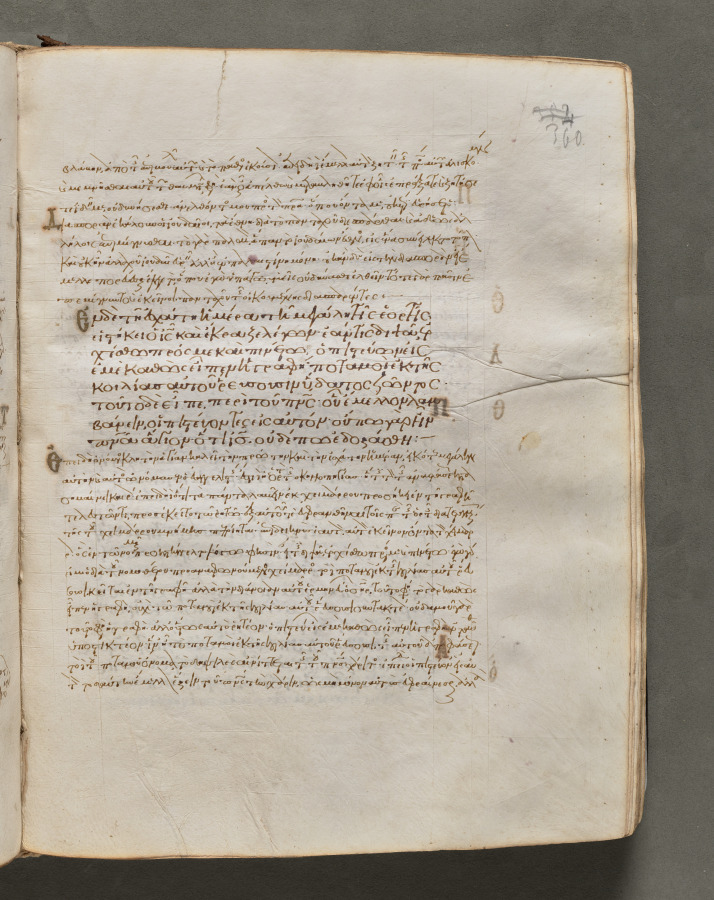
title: Text, folio 360 (recto), from a Gospel Book with Commentaries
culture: Byzantium, Constantinople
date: c. 1000–1100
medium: ink, tempera, and gold on vellum; leather binding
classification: Bound Volume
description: Each of the four gospels in this book opens on a page with brilliantly illuminated borders depicting the author of the text as well as birds—principally peacocks, symbols of the immortality of the soul—and fountains, representing the fountain of life and the salvation of the soul. This volume consists of 428 leaves with texts in Greek. Its level of sophistication suggests that it was probably written and decorated in a monastery in Constantinople.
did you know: Gospel books were carried in procession through Byzantine churches.